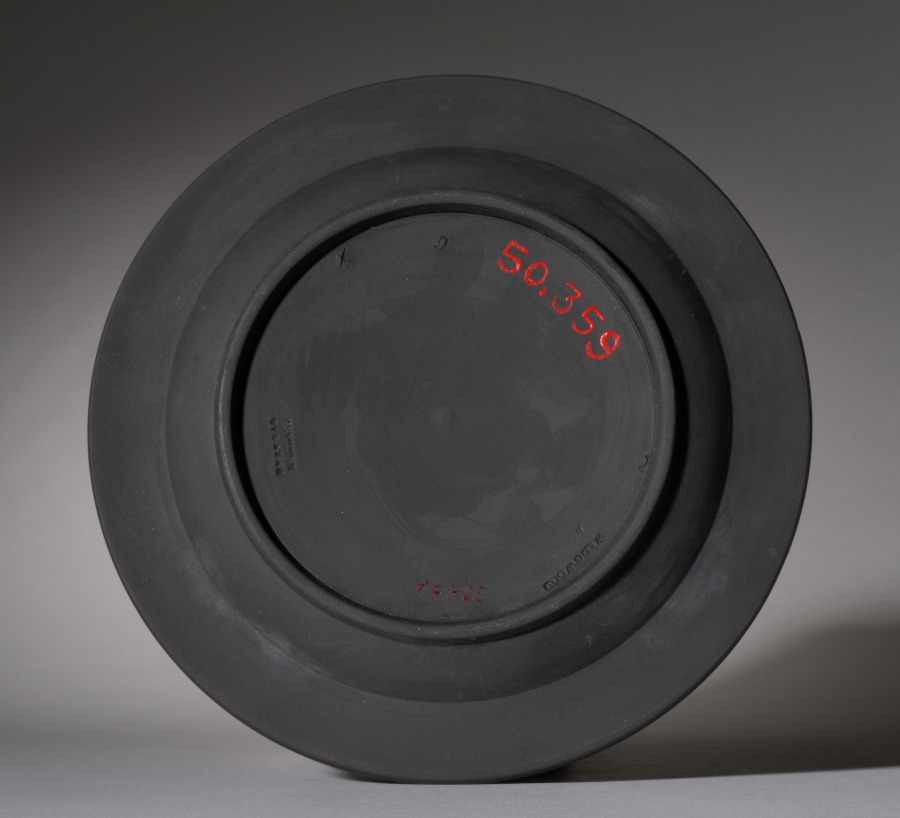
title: Small Plate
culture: England, Staffordshire, 19th century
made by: Wedgwood Factory (British)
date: 1800s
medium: black basalt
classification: Ceramic